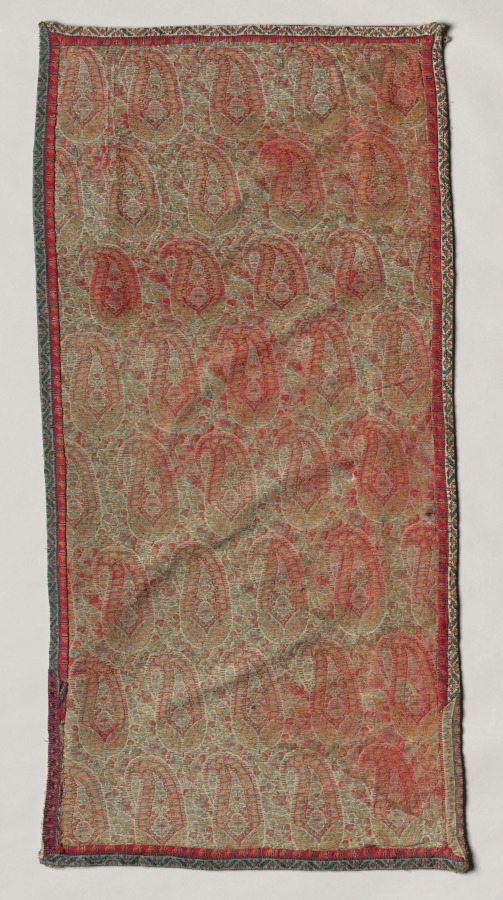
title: Lining from Silk Textile with Goatherds in a Landscape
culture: Iran, Isfahan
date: 1900s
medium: twill tapestry, double locked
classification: Textile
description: This textile has a repeated design of goatherds piping to goats in a landscape setting. At the top is an inscription reading: “Work of the servant of the court, Abū al-Quāsim Kāshānī, year 929.” In the Muslim calendar 929 is equivalent to 1523, but this fabric was woven in the 1900s. This textile emulates examples from the Safavid period (1501–1722), regarded as a high point of Iranian culture. A lampas weave is characterized by the combination of two weave structures with two sets of wefts—the threads over and under which the warp threads are woven. Threads of the pattern weft are laid on top of the background weft to form the design. Lampas is typically woven in silk, sometimes with the addition of metallic thread.